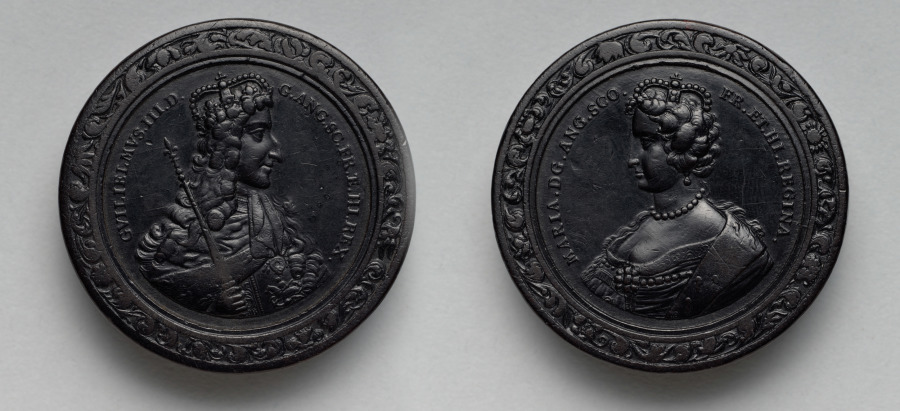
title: Gaming Piece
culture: Germany, late 17th-early 18th Century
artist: Martin Brunner (German, 1659–1725)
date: c.1700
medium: wood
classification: Furniture and woodwork